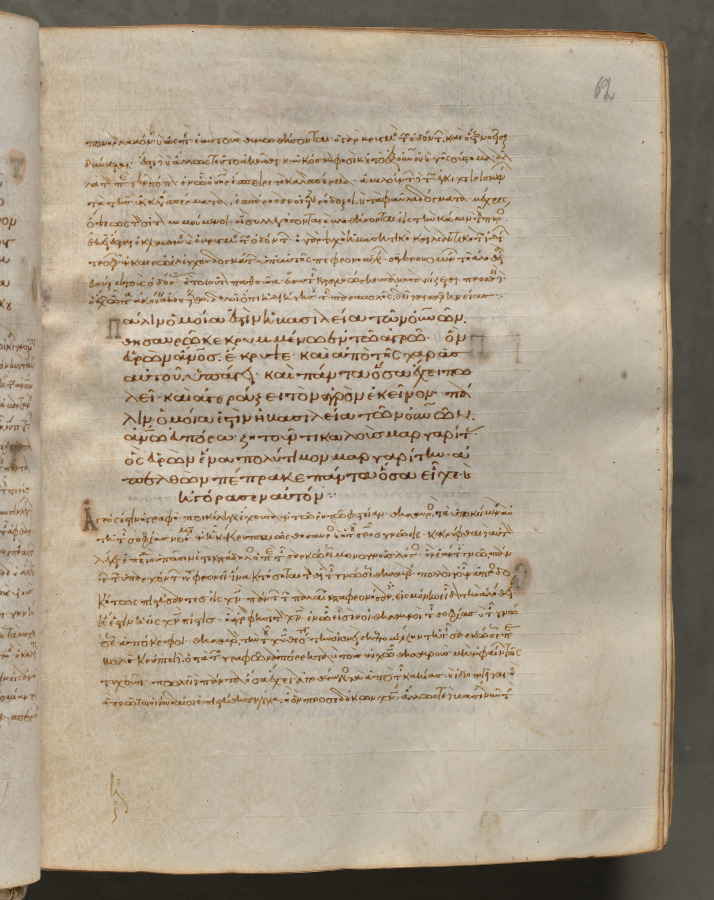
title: Text, folio 62 (recto), from a Gospel Book with Commentaries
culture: Byzantium, Constantinople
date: c. 1000–1100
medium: ink, tempera, and gold on vellum; leather binding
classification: Bound Volume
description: Each of the four gospels in this book opens on a page with brilliantly illuminated borders depicting the author of the text as well as birds-principally peacocks, symbols of the immortality of the soul-and fountains, representing the fountain of life and the salvation of the soul. This volume consists of 428 leaves with texts in Greek. Its level of sophistication suggests that it was probably written and decorated in a monastery in Constantinople.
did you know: Gospel Books were carried in procession through Byzantine churches.